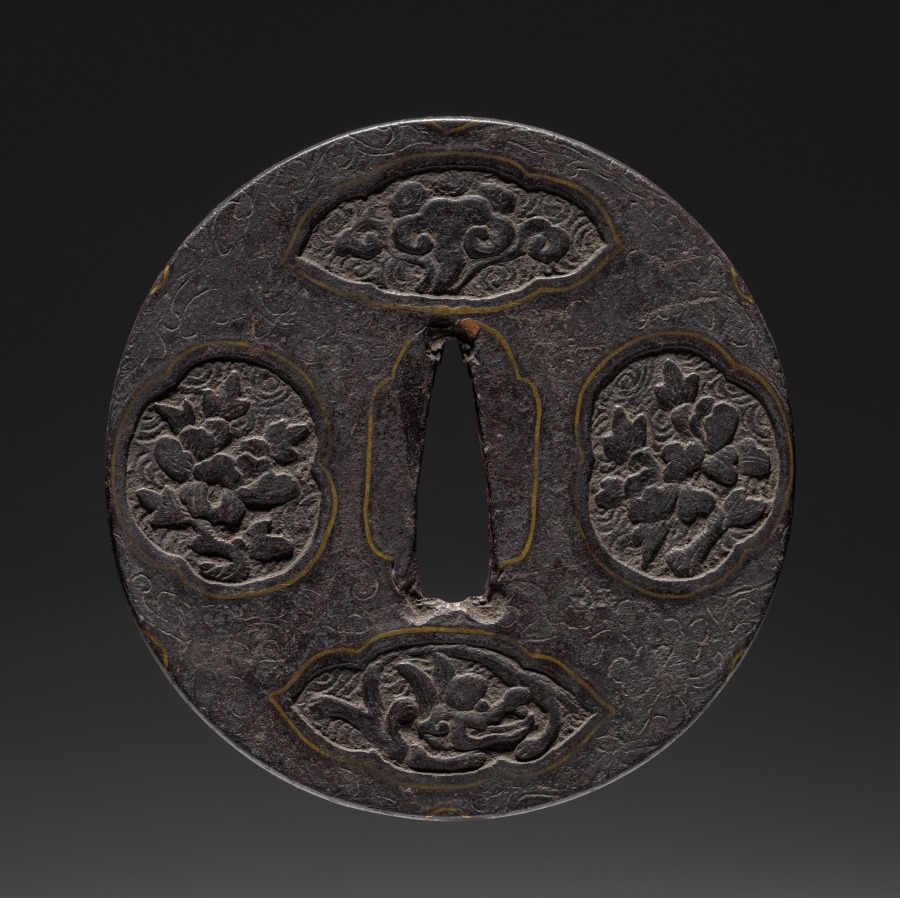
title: Sword Guard (Tsuba)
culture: Japan, possibly Edo period (1615-1868)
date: c. 1615–1868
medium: iron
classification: Arms and Armor